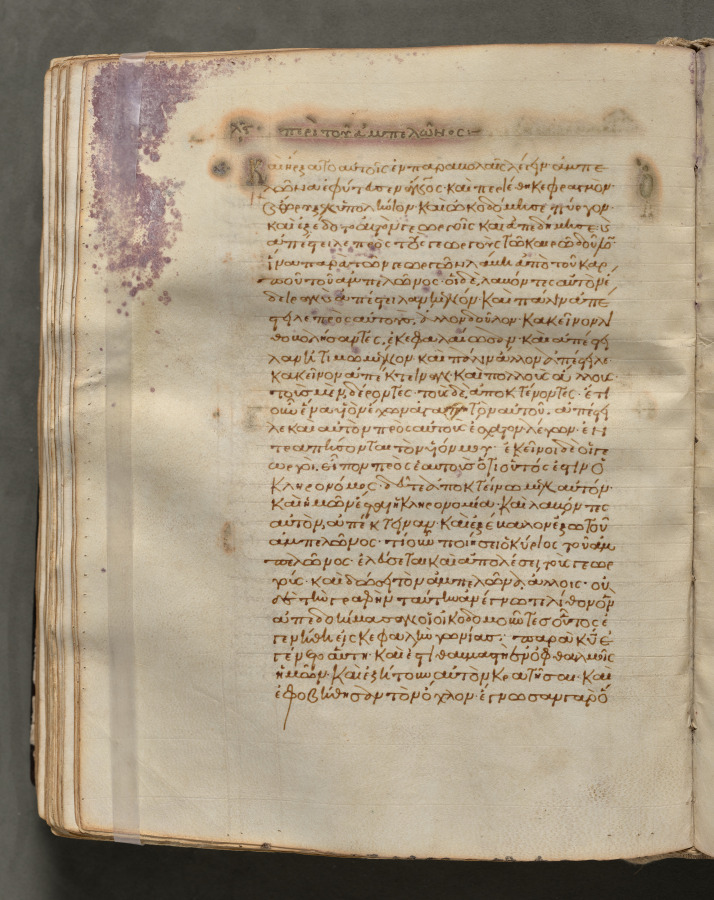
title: Text, folio 176 (verso), from a Gospel Book with Commentaries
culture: Byzantium, Constantinople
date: c. 1000–1100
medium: ink, tempera, and gold on vellum; leather binding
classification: Bound Volume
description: Each of the four gospels in this book opens on a page with brilliantly illuminated borders depicting the author of the text as well as birds-principally peacocks, symbols of the immortality of the soul-and fountains, representing the fountain of life and the salvation of the soul. This volume consists of 428 leaves with texts in Greek. Its level of sophistication suggests that it was probably written and decorated in a monastery in Constantinople.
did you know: Gospel Books were carried in procession through Byzantine churches.